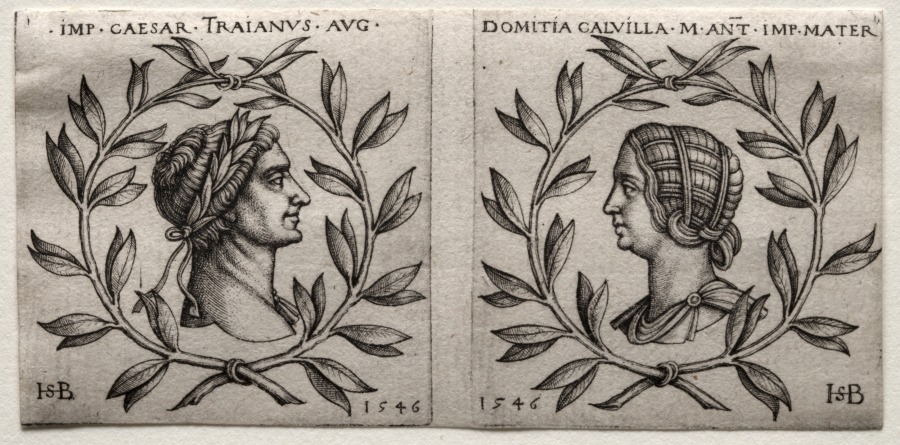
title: Busts of Emperor Trajan and Domitia Calvilla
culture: Germany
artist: Hans Sebald Beham (German, 1500–1550)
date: 1546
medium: engraving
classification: Print